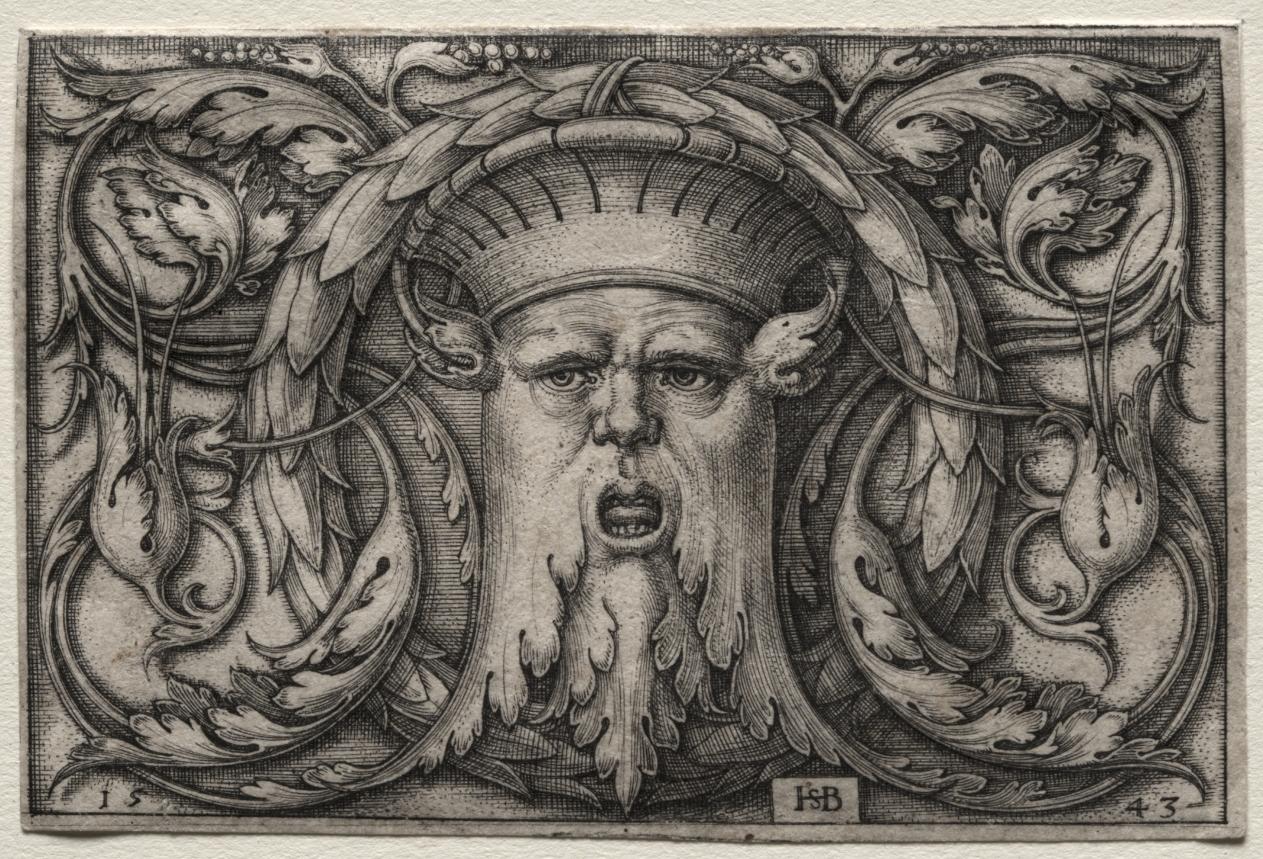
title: The Mask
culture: Germany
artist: Hans Sebald Beham (German, 1500–1550)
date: 1543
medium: engraving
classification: Print